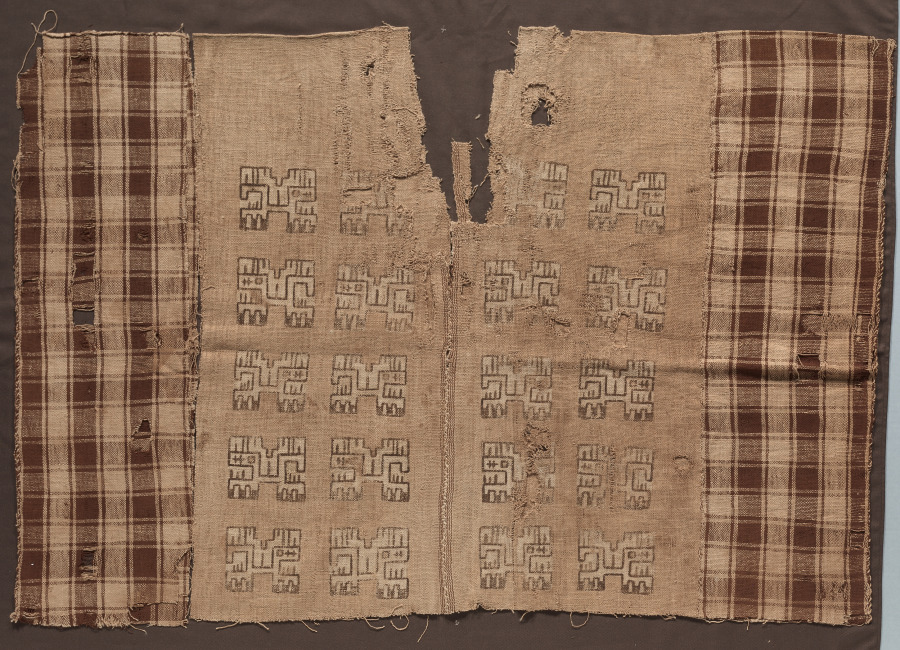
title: Tunic with Profile Animals and Checkerboards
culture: Peru, South Coast, Paracas or Nasca?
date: 410–540 CE (radiocarbon date, 93% probability)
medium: cotton; dye-patterned plain weave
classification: Textile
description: The imagery in the central field of this unique tunic—animals with long tails and three-toed feet—seems to have been created by painting a slurry-like material on the pale areas to protect them when the fabric was immersed in a bath that turned other areas light brown. Then the slurry was removed, revealing the pattern. The checkerboard areas at the sides, on the other hand, are woven with brown and cream-colored yarns. Specialists puzzle over the origins of the tunic, some attributing it to the Paracas (700 BCE–1 CE) and others to the Nasca (100 BCE–650 CE), who sprang from Paracas roots.